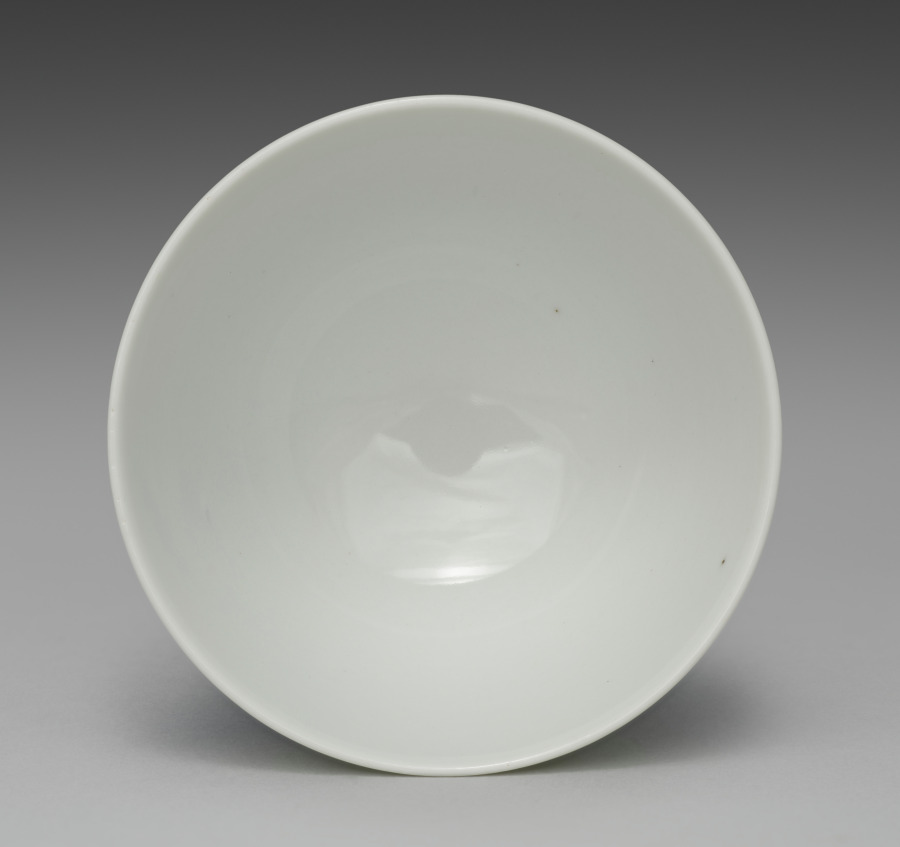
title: Teacup from Tea Set with Orchids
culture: Japan, Meiji period (1868–1912)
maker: Seifū Yohei III (Japanese, 1851–1914)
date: c. 1893–1914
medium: Porcelain with underglaze blue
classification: Ceramic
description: Although the teapot here is stored in a separate box from the five cups, these six pieces may once have been part of a tea set that included other tools such as a water cooler. The teacups have orchid flowers on both sides in underglaze blue, as well as a blue band inside the footring. The teapot has the same design and a blue band painted around the bottom of the lid’s knob. The cups’ long wood storage box is stamped on the exterior, over the lid and base, with a small red seal reading “Satō.” The same seal appears on five small squares of yellow textile, one placed in the bottom of each compartment in the teacup storage box. These are additional to the customary yellow cloths stamped with a “Seifu” seal. Interestingly, four of the Seifū cloths are stamped with an ovoid seal, while the remaining cloth, which is a slightly lighter color, has an unusual seal that is not quite gourd-shaped and with the fū of Seifū in a stylized, unrecognizable form. The teapot has its own box with a Satō seal and is wrapped with an orange textile stamped with the same unusual Seifū seal. A set with a very similar surface design is in the Brooklyn Museum. The Brooklyn set has a water cooler and a small pitcher, in addition to the teapot and cups, and all are in a single storage box. This box records the tea tools as made with kanpakuji, or “bright-jewel white porcelain,” counted among Yohei III’s most important inventions, and carved images. In fact, both sets have a white surface much closer in coloration to the cool white of porcelain clay used in Kyoto at the time, and the designs are simply painted. The Brooklyn set was thus likely mismatched at some point with a box intended for another tea set. Nonetheless, the box may have helped prevent the set’s original components from being dispersed, and the set itself provides insight into how the other tools from the present set may have looked.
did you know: This tea set with orchids has a side-handled pot called a kyūsu, used for steeping, straining, and serving tea.